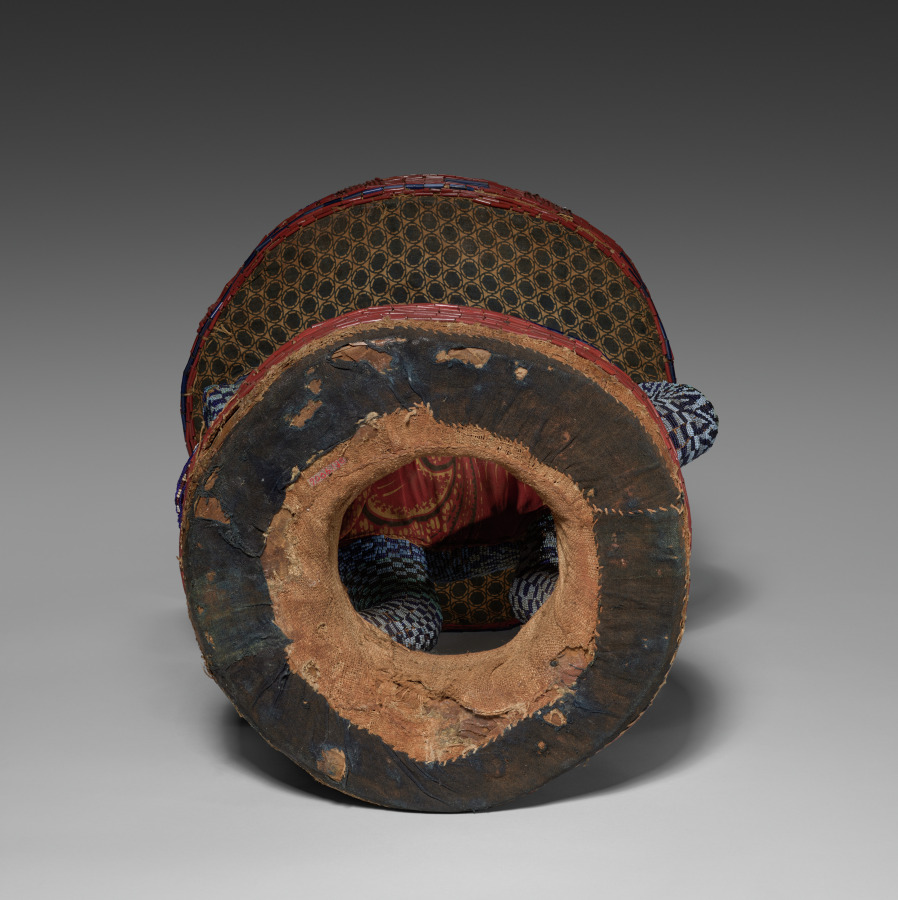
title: Prestige stool (Kuo fo)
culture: Africa, Central Africa, Cameroon, Bandjoun Kingdom, Bamileke makers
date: possibly 1800s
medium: Wood, cotton, plant fiber, glass beads, and indigo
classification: Furniture and woodwork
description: Bead-covered wooden stools and thrones are one of the most prevalent art forms among the various kingdoms and chiefdoms in the Cameroon Grassfields region. This example, once part of the royal treasury, belongs in the category of "travel stools," usually used in conjunction with more private, minor ceremonies and rituals at the palace. The leopard imagery confirms the object’s royal status. It alludes to the belief that the king could temporarily transform himself into this feared predator.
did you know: The beads on this stool were sewn on by hand. Look underneath the stool, however, and you can see commercially made printed fabric.